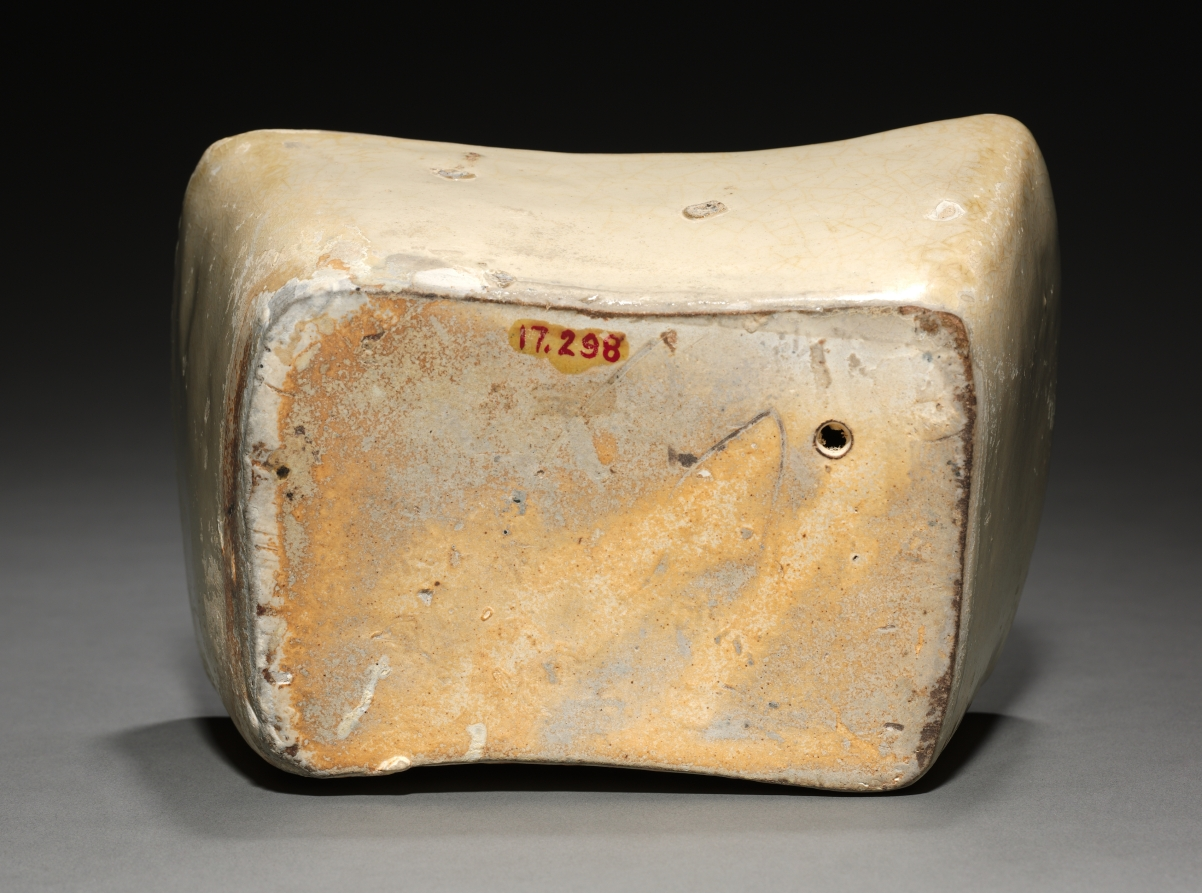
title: Pillow: Wazhaping ware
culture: China, Hunan province, Changsha, Five dynasties (907-960)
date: 906–960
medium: glazed stoneware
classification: Ceramic